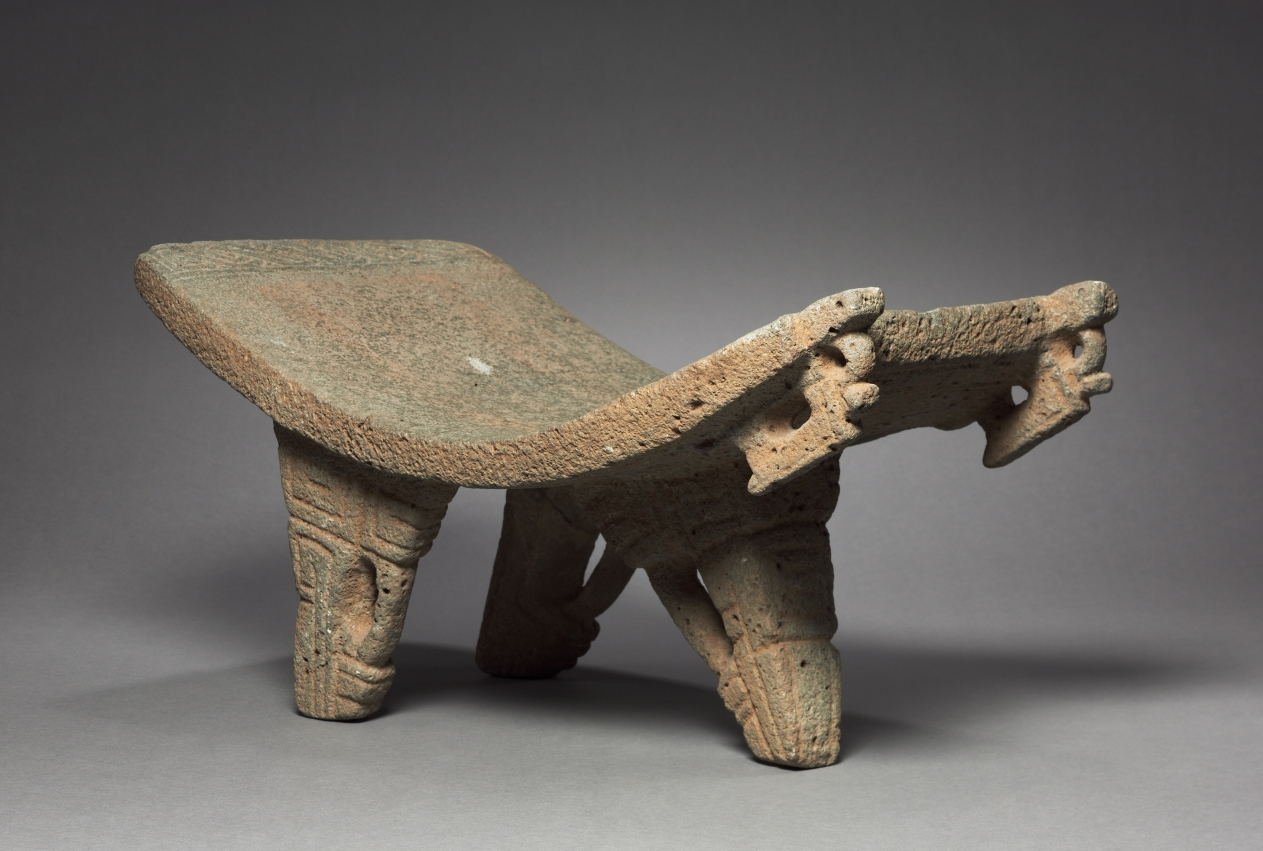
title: Metate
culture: Costa Rica, Guanacaste, northwest coast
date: 1200–1500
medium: gray volcanic stone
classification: Sculpture